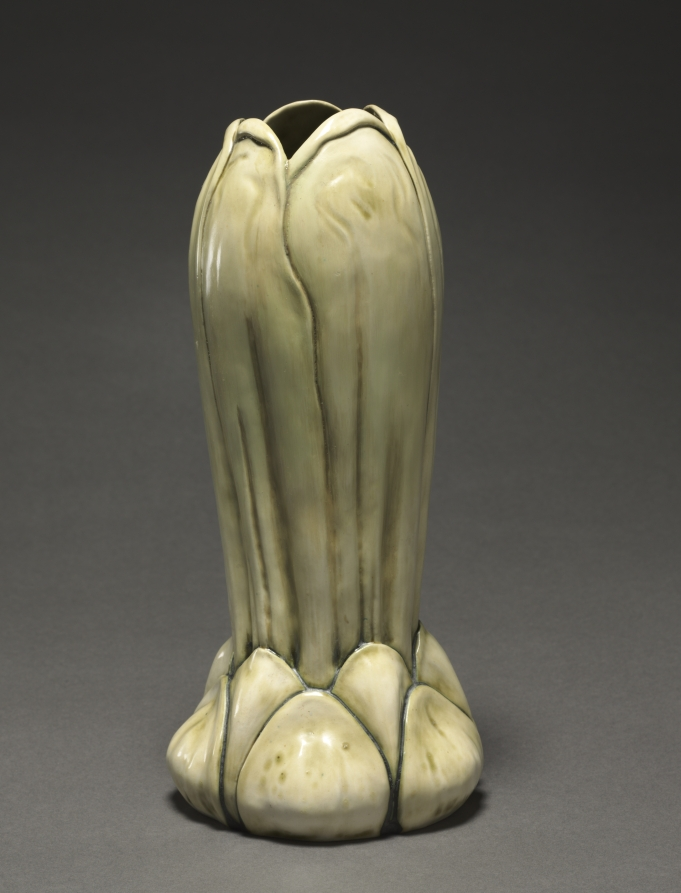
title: Artichoke Vase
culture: America, New York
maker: Tiffany Studios (United States, New York, 1902–32)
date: c. 1905–10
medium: Glazed white clay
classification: Ceramic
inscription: engraved on underside: LCT 7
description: By 1900 Louis Comfort Tiffany had expanded his empire by increasing the firm’s production of “fancy goods,” including inkstands, candlesticks, clocks, small boxes, desk sets, tea screens, and other functional objects. Along with the array of artistic glass designs from his factory in Corona, Queens, works in ceramic, bronze, other metals, and even jewelry abounded. These affordable luxury items were designed with as much thought to artistry as the great stained glass windows and lamps through which the firm enjoyed unrivaled success.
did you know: Ceramic works were Louis Comfort Tiffany's contribution to the art pottery movement of the early 1900s.